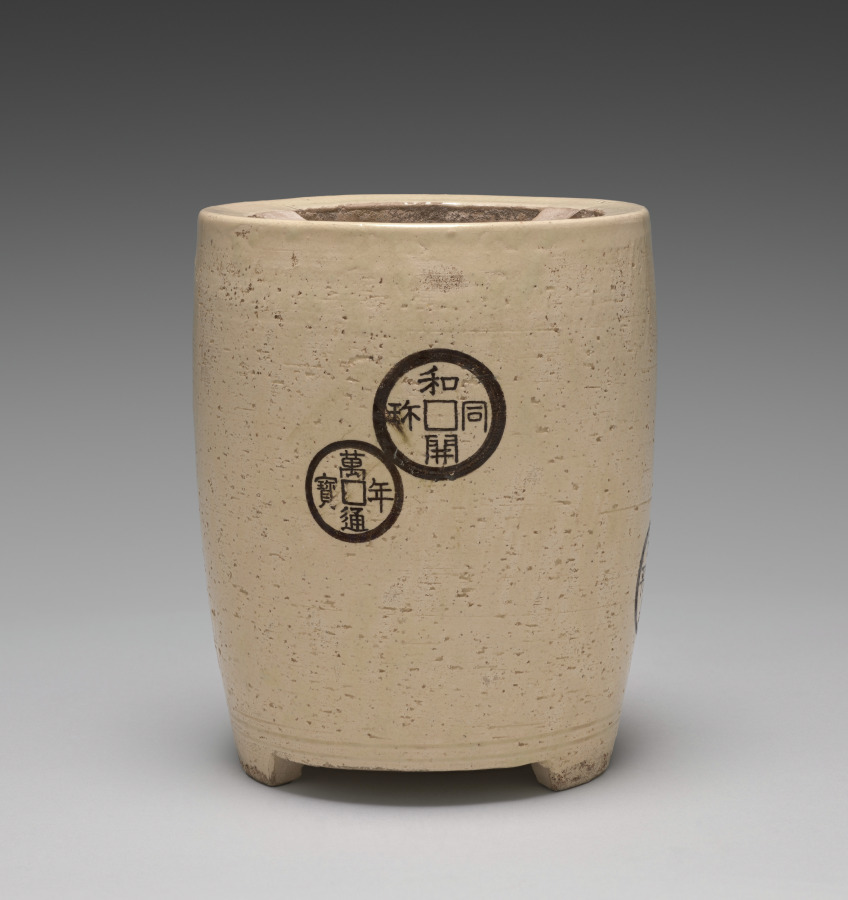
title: Brazier with Coins Motif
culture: Japan, Meiji period (1868–1912)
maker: Seifū Yohei III (Japanese, 1851–1914)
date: 1893–1914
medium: Stoneware with underglaze iron oxide designs and crackling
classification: Ceramic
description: Tall pottery braziers called ryōro are often used to heat the water for the tea served at sencha gatherings. This one sits on three sturdy legs, one of which bears the artist’s seal on its face. A horizontal rectilinear opening above this leg allows air to circulate into the lower part of the brazier. The top part is outfitted with three prongs onto which the kettle can be lowered; below them is a basin, perforated with circular holes, that holds the charcoal fuel. The brazier is decorated under the crackled transparent glaze with a design of old coins in iron oxide. The motif is cleverly chosen, for most older coins are round with a central hole, often square, which echoes the cylindrical form of the brazier with its rectilinear “wind gate,” or fūmon.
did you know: One coin is painted with the Japanese god of wealth, Daikokuten, standing upon two bales of rice.